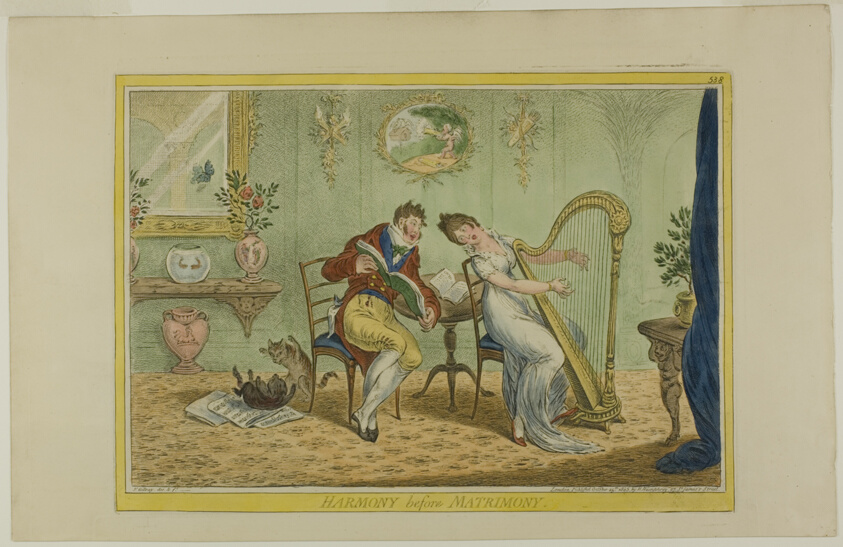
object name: Print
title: Harmony Before Matrimony (recto); Clearing the Five Bar Gate (verso)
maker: James Gillray (English, 1756-1815); published by Hannah Humphrey (English, c. 1745-1818)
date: published October 25, 1805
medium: Hand-colored etching on paper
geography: England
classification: etching; print; prints and drawing